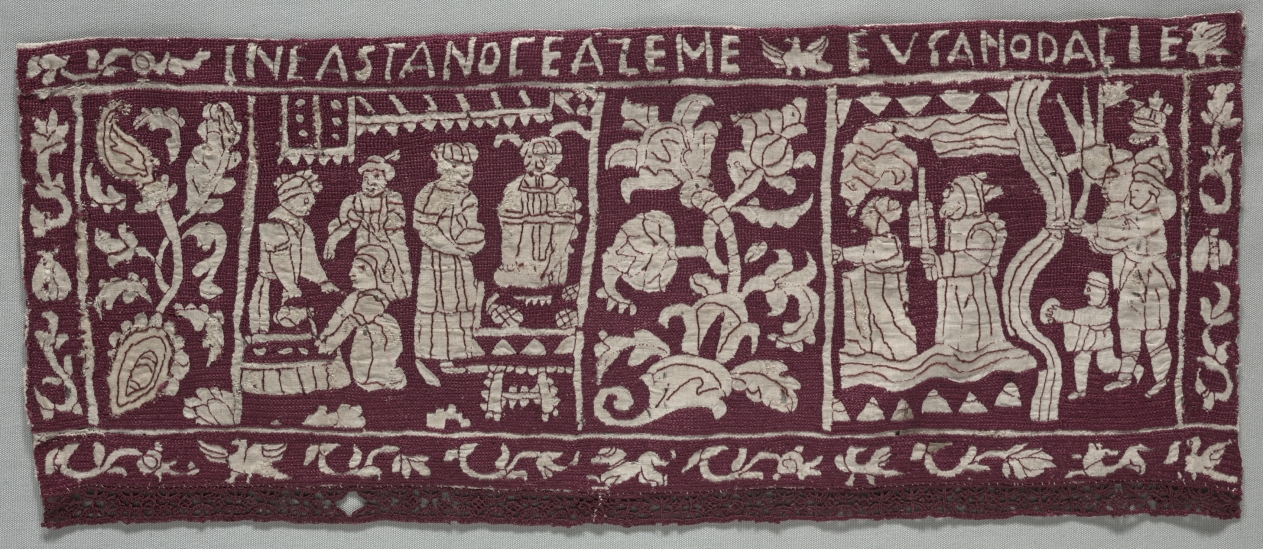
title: Embroidered Border: The Making of Unleavened Bread and the Israelites Sent Away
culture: Italy, 16th-17th century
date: 1500s-1600s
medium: Plain weave linen; embroidery in silk; attached border of needle lace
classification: Embroidery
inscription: Embroidered lettering in upper margin: INEASTANOCEAZEME / EVGANODACIE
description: The border fragments on the left tell the story of the Israelites baking unleavened bread during the first Passover, after which they were delivered out of captivity in Egypt. In the top panel, bakers mix and knead the dough; the bottom panel shows the bakers standing on a tiled floor while placing the bread into a brick oven. This common household scene would have been familiar to Italian audiences during the Renaissance. Two fragments depict events recorded in the book of Exodus. In the top panel, the pharaoh is shown releasing the Israelites after the last plague (1939.355). In the bottom panel, he changes his mind and pursues them across the parted Red Sea, only to be swallowed up after the Israelites safely crossed (1939.352).